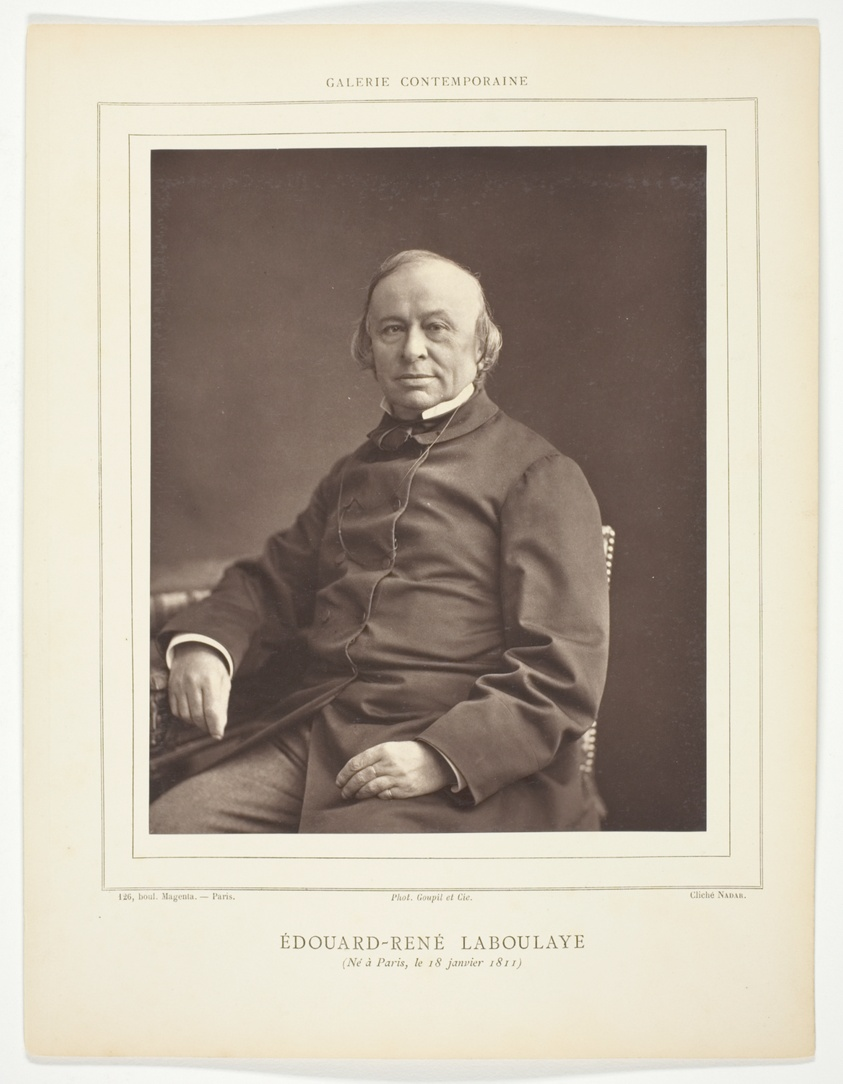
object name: Photograph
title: Edmond-René Laboulaye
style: 19th century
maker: Nadar (Gaspard Félix Tournachon) (French, 1820–1910)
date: 1853/79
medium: Woodburytype, from the periodical “Galerie Contemporaine Littéraire, Artistique” (1879), volume 7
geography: France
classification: woodburytype; photomechanical process; photography; photograph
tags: Collected by Hugh Edwards, Paris, Contemporaine Littéraire